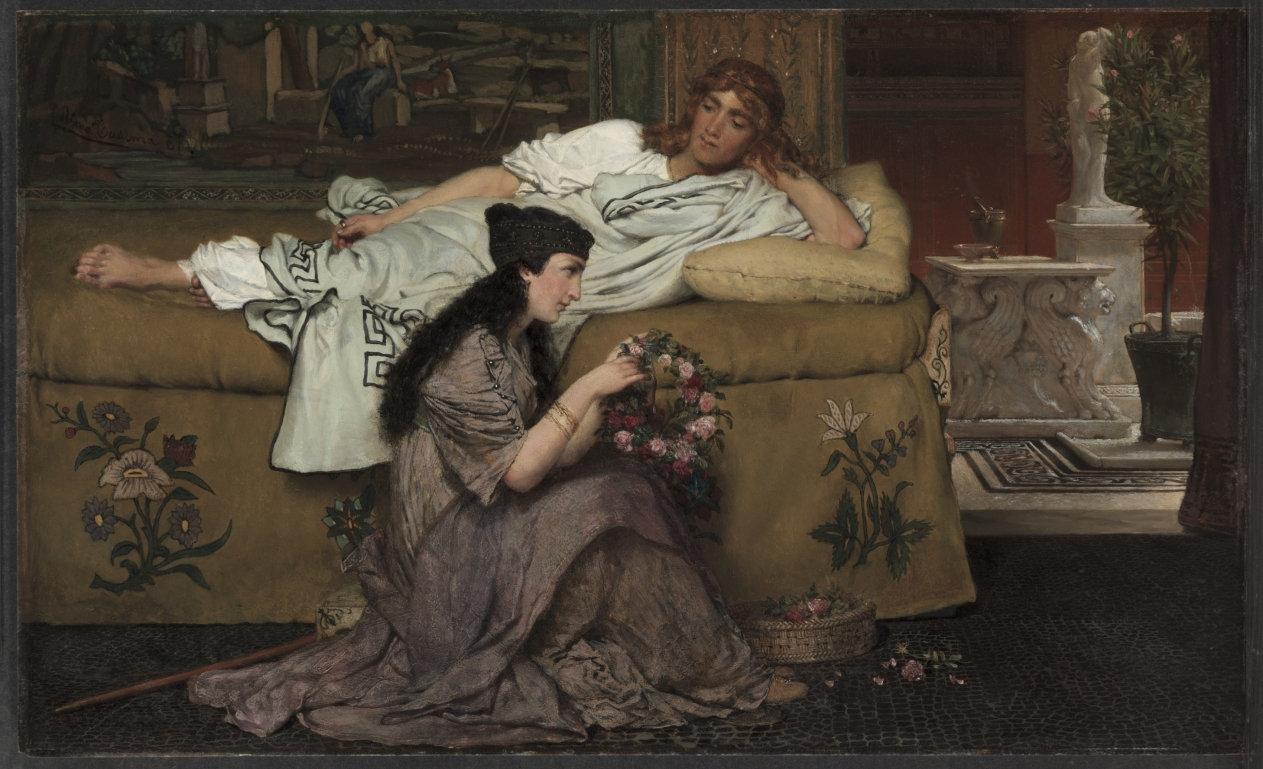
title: Glaucus and Nydia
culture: England, 19th century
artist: Lawrence Alma-Tadema (British, 1836–1912)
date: 1867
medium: oil on wood panel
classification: Painting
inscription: Signed upper left: L. Alma Tadema 67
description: "It was one of the few moments in her brief and troubled life that it was sweet to treasure." Weaving a rose garland as a present for her beloved master Glaucus, the blind servant Nydia resists speaking of her love for him. The scene is based on Sir Edward Bulwer-Lytton's enormously popular historical novel The Last Days of Pompeii (published in 1835), a melodramatic epic set in ancient Roman times, which culminates with the eruption of Mount Vesuvius. Responding to the 19th-century appetite for things antique, the artist filled his historical scenes with depictions of Roman frescoes and statuary. Dutch by birth, Alma-Tadema made this picture in Brussels for a London art dealer. But the demand for such paintings became so great that he moved to England, where he achieved great financial and social success.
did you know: Alma-Tadema, one of the most popular Victorian painters, became famous for his depictions of the luxury and decadence of the Roman Empire. His vision of the ancient world was constantly reproduced on film in Hollywood.